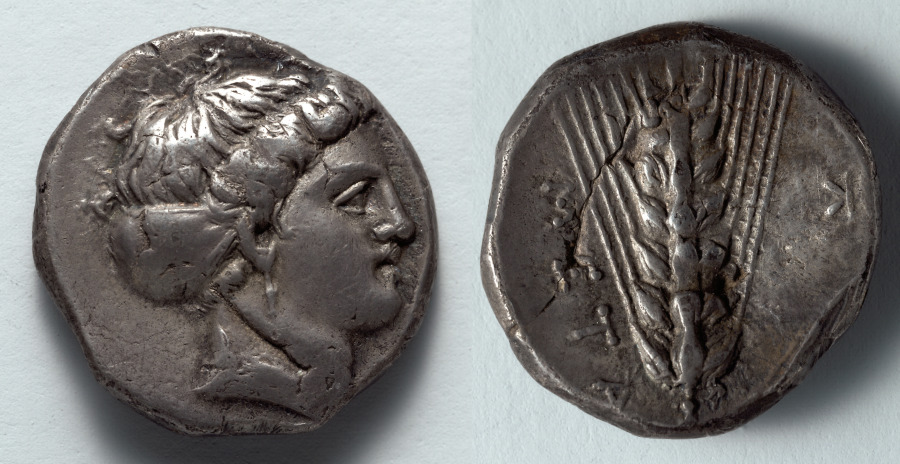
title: Stater: Head of Kore (obverse); Barley (reverse)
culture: Greek, minted at Metapontion (South Italy)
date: c. 340 BCE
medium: silver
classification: Coins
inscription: ΜΕΤΑ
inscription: ꓘ